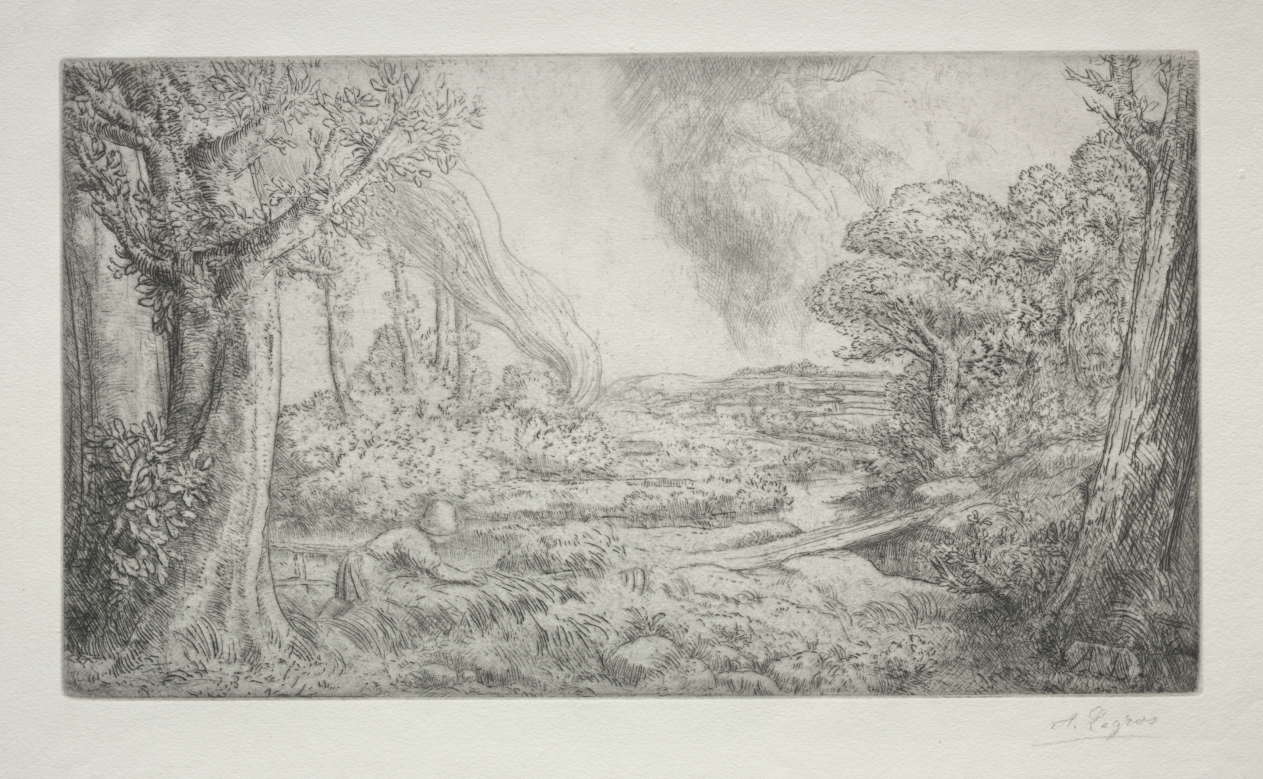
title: Landscape (Paysage)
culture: France, 19th-20th century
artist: Alphonse Legros (French, 1837–1911)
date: c. 1857–1911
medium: etching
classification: Print